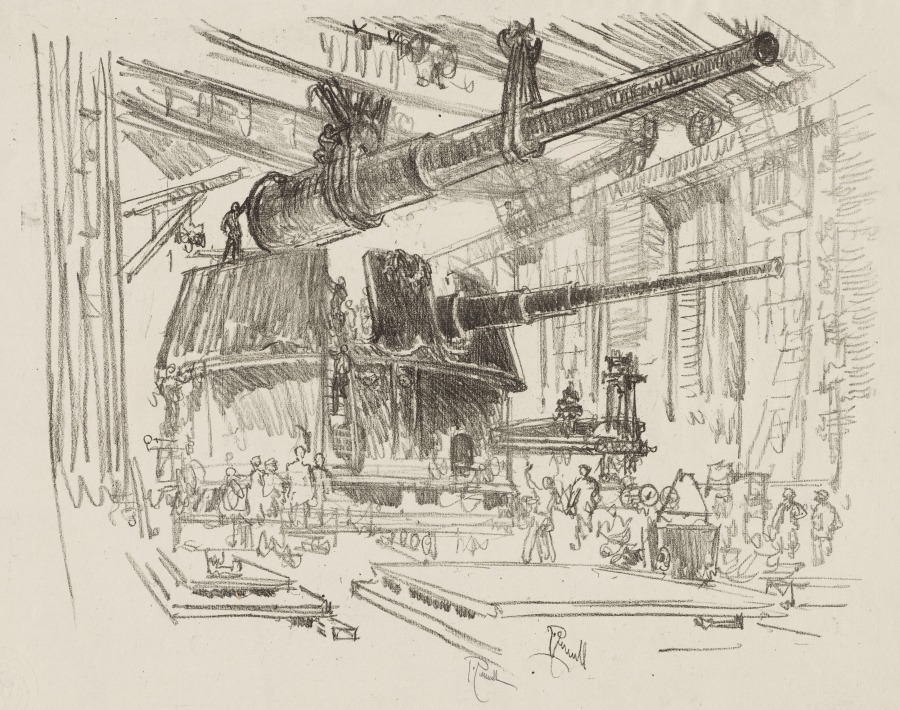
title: English War Work: Fitting Guns in Turrets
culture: America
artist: Joseph Pennell (American, 1857–1926)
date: 1916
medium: lithograph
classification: Print